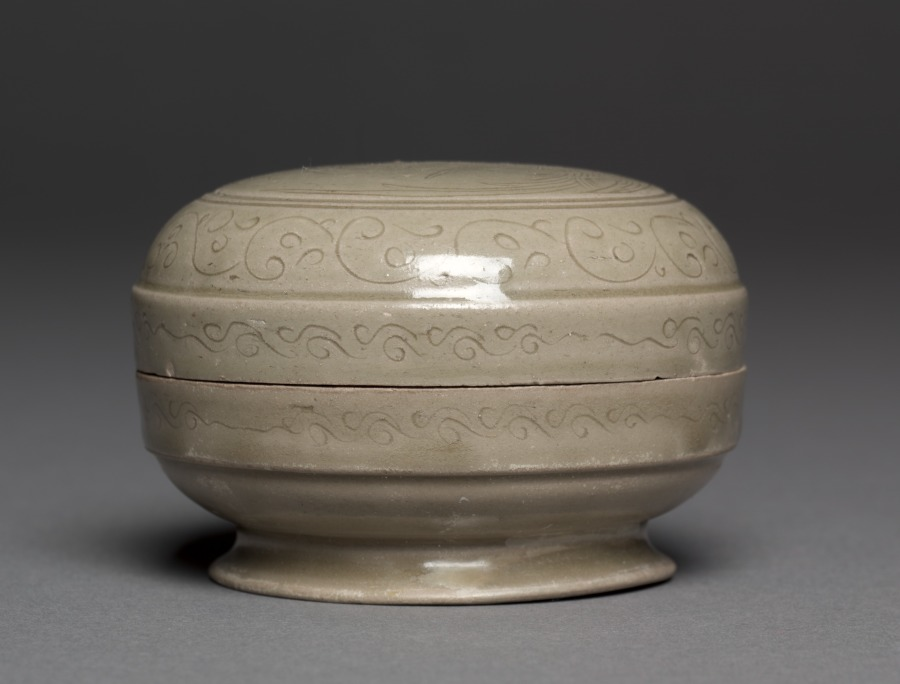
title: Covered Box with Double-Parakeet Design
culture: China, Zhejiang province, Five dynasties (907-60) or later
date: 900s-1100s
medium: Glazed stoneware with incised decoration, Yue ware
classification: Ceramic